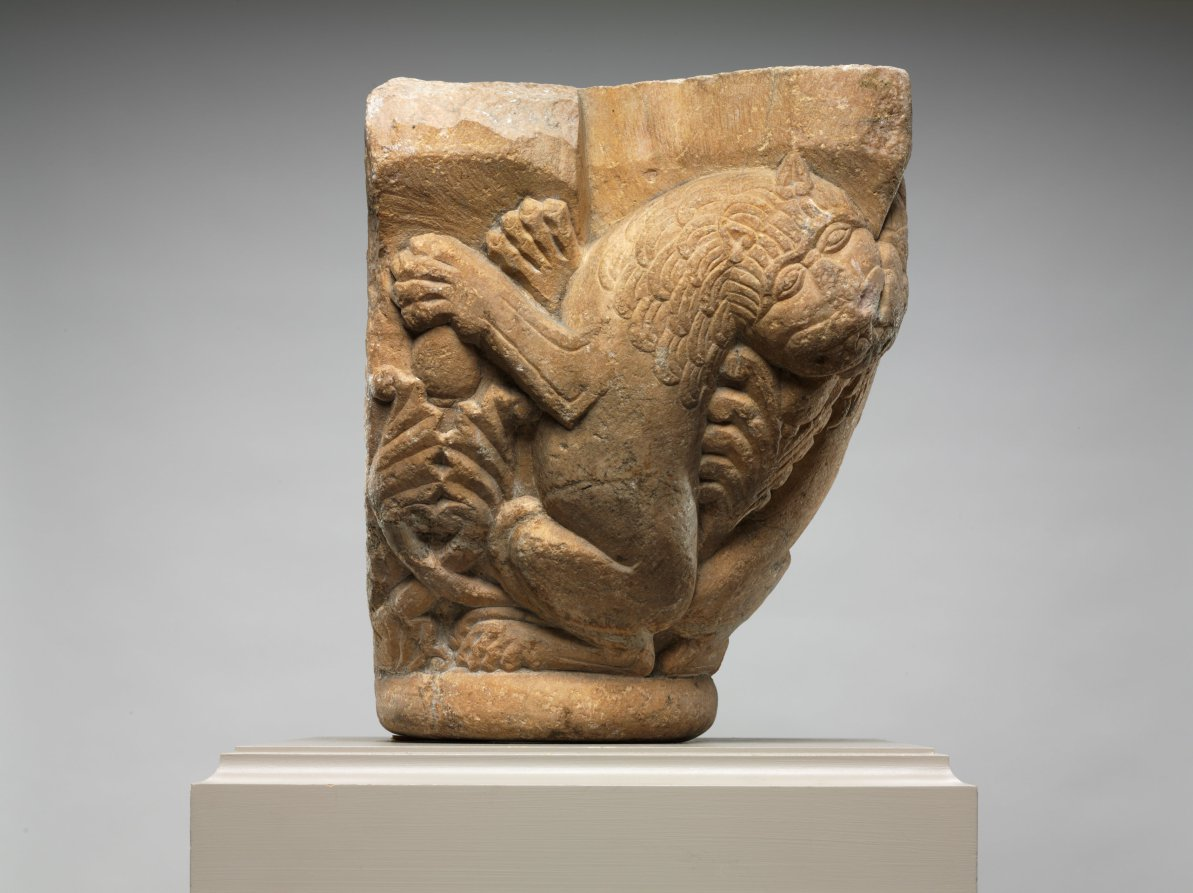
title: Engaged Capital with Lions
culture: Northern Spain (Navarre ?) or Southwest France (Pyrénées or Roussillon ?), mid-12th century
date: 1145–64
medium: marble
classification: Sculpture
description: The compositional motif of confronted and addorsed beasts illustrated on this capital was especially popular in churches along the pilgrimage roads.